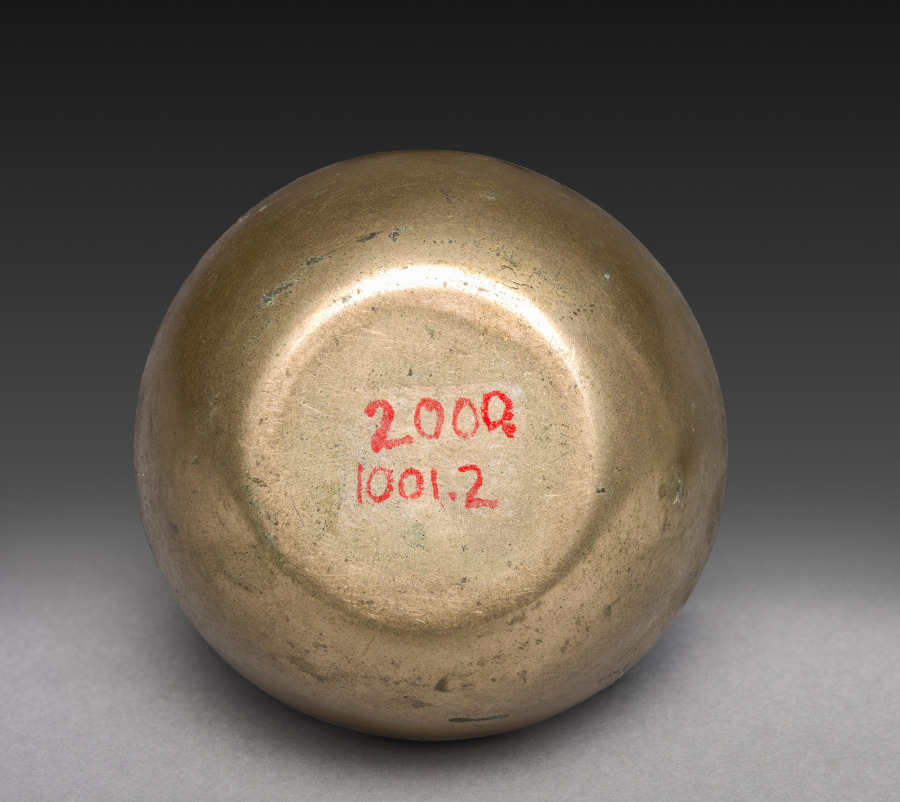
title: Wine Cup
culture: North Korea, Yochon, unassigned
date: unassigned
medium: brass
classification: Metalwork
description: In ancestor veneration rituals, deceased parents or ancestors are sanctified as spirits who are believed to oversee their descendants. Three times a year, once at the lunar new year, once at the person’s death date, and once at the time of the mid-autumn festival, food would be placed on the table for the ancestors, including fruits, rice, meat, and rice wine. During these ceremonies the worshipers’ attitude was as reverential toward the objects meant to embody the ancestors’ spirits as that toward a living parent. This pair of brass cups may have been used for ancestral rituals to contain rice wine.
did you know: This pair of bronze cups may have been used in family rituals such as ancestral worship ceremonies.